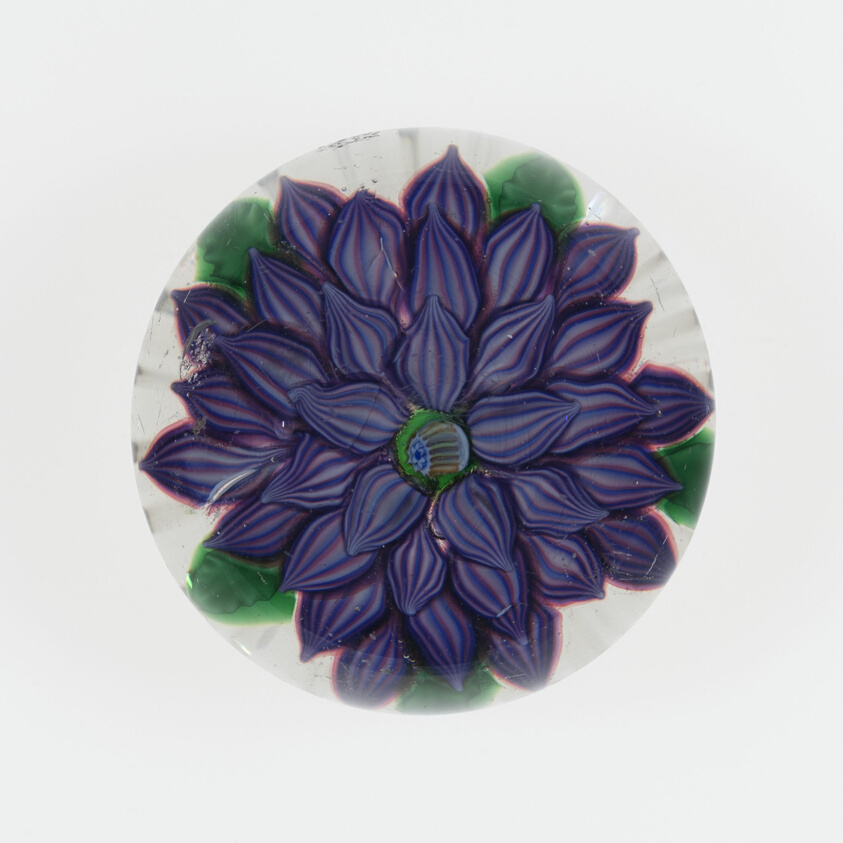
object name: Glass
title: Paperweight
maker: Saint-Louis Glassworks (Cristalleries de Saint-Louis); Lorraine, France, founded 1586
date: c. 1848–55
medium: Glass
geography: Saint-Louis-lès-Bitche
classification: paperweight; lampwork; european decorative arts; glass